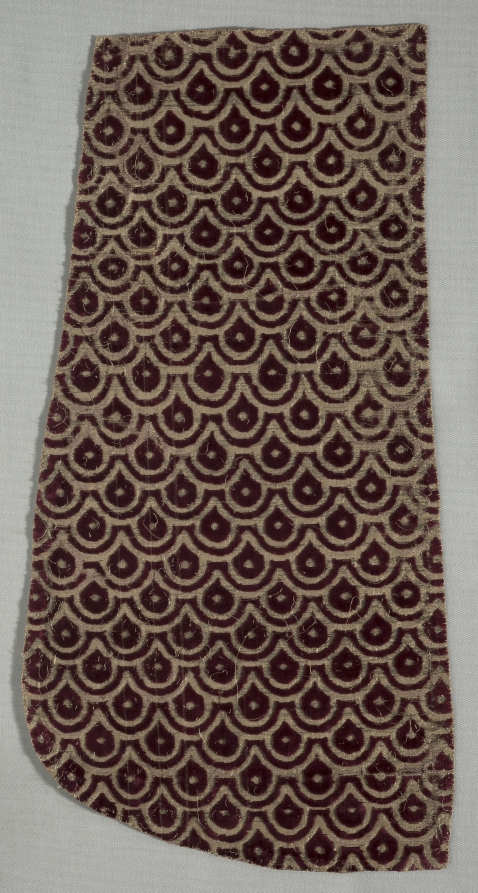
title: Fragment of a Chasuble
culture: Italy, 15th century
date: 1400s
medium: velvet (cut and voided); silk and metal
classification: Velvet